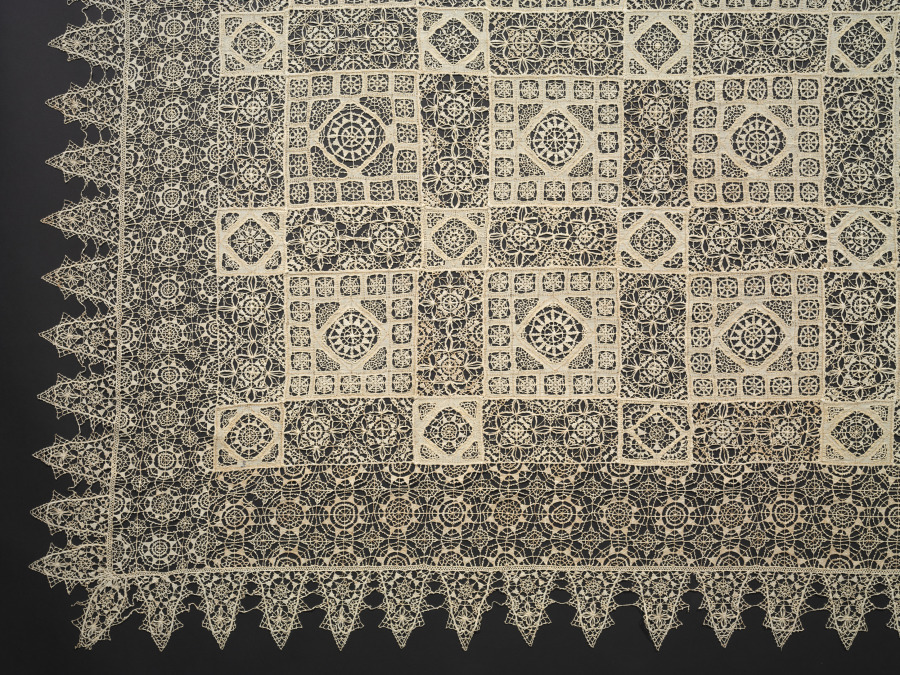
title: Lace Cloth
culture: Italy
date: 1560–1600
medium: Linen; needle lace (cutwork and reticella)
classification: Lace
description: Consisting of more than 80 squares of cutwork (a cut and embellished linen ground) and rectangles of reticella (needle lace), this luxurious cover could have been made by a single person or several people who divided the work. Close looking reveals that the cloth is made with threads of two very slightly different colors: bleached and unbleached linen. Together the sections resemble snowflakes, which are of similar shape and size but vary subtly from one another. The perplexing dark stitches in the upper left corner do not repair damage, and might be the maker’s signature.